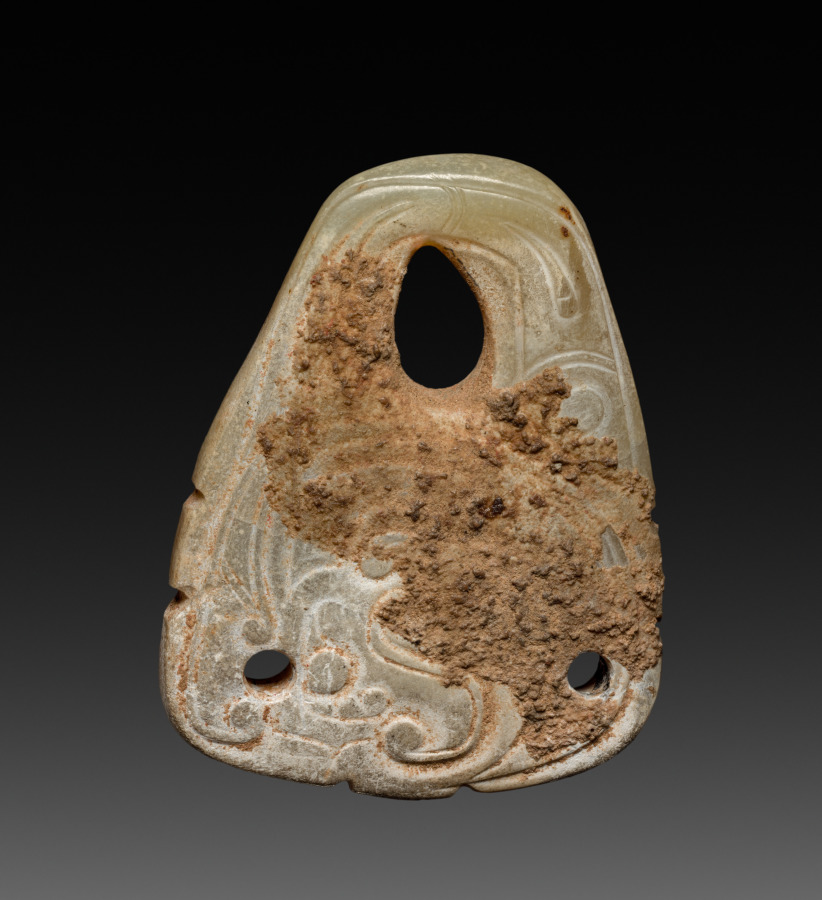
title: Pendant with Coiled Dragon and Fish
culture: China, Western Zhou dynasty (c. 1046–771 BCE)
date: 1000–900 BCE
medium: jade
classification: Jade